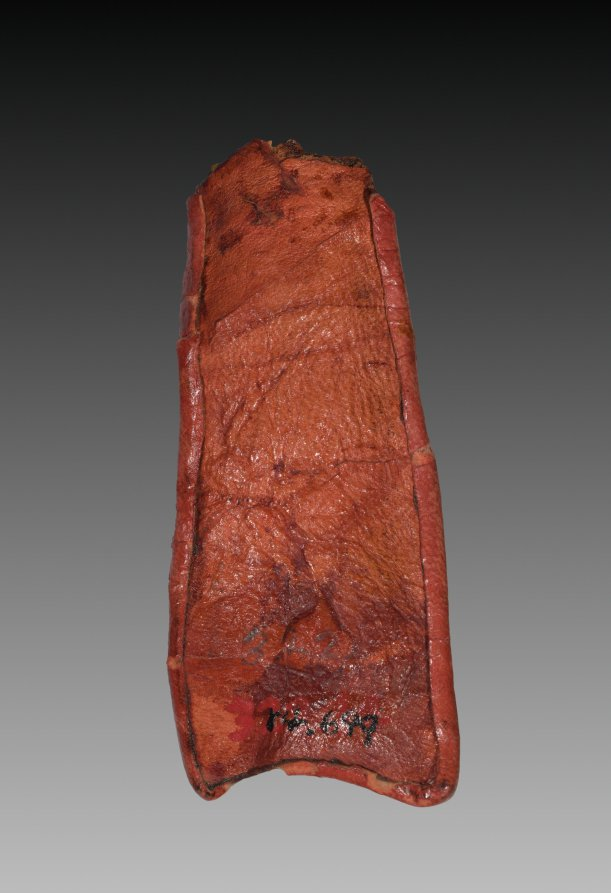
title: Tab from Mummy Band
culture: Egypt, Third Intermediate (1069–715 BCE), Dynasty 22, reign of Osorkon I (992–887 BCE)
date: 945–715 BCE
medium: stained leather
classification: Funerary Equipment